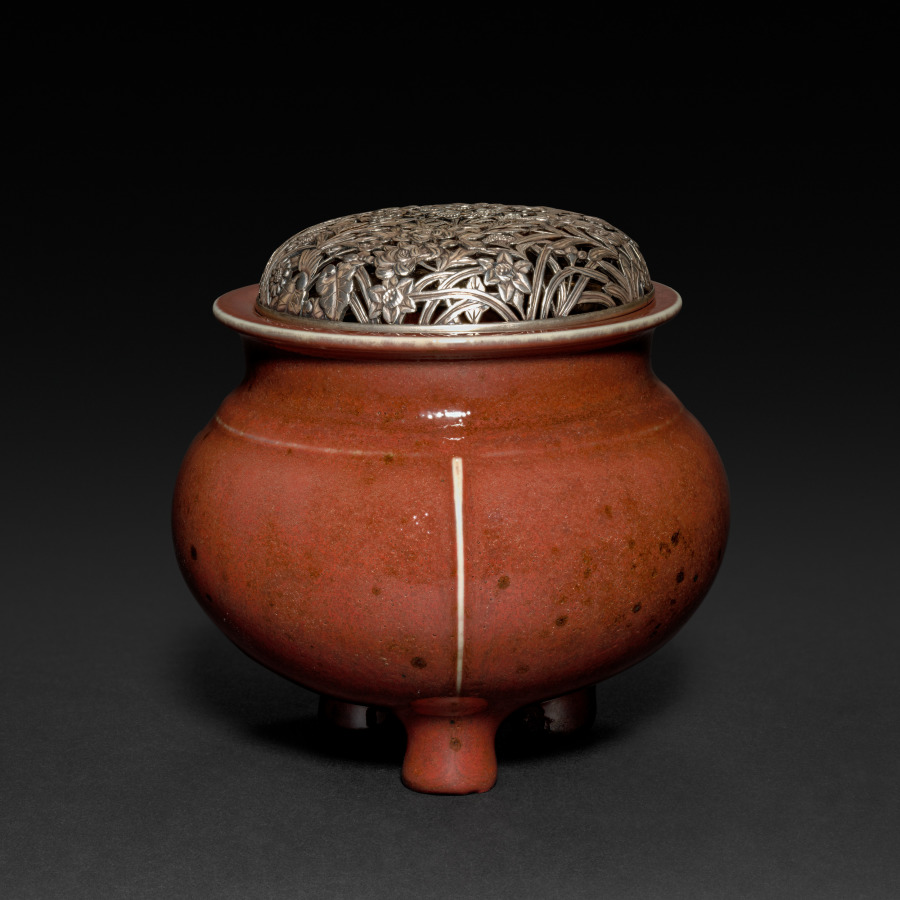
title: Incense Burner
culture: Japan, Meiji period (1868–1912)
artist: Seifū Yohei III (Japanese, 1851–1914)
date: 1893–97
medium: Porcelain with molded design, crimson glaze, and floral openwork silver lid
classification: Ceramic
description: Seifū Yohei III made incense burners in a wide variety of designs and styles. Their silver lids were produced outside the studio by metalwork specialists. This tripod incense burner has a distinctive red-colored glaze and linear molded decorations that run around the base of the collar and down the legs.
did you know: Seifū Yohei III’s incense burner with a variety of flowers on its lid has a glaze described as “crimson glaze” (kōyū); it is also dappled with dark spots of varied opacity and tiny pores throughout, which gives the container a rich, textured effect.